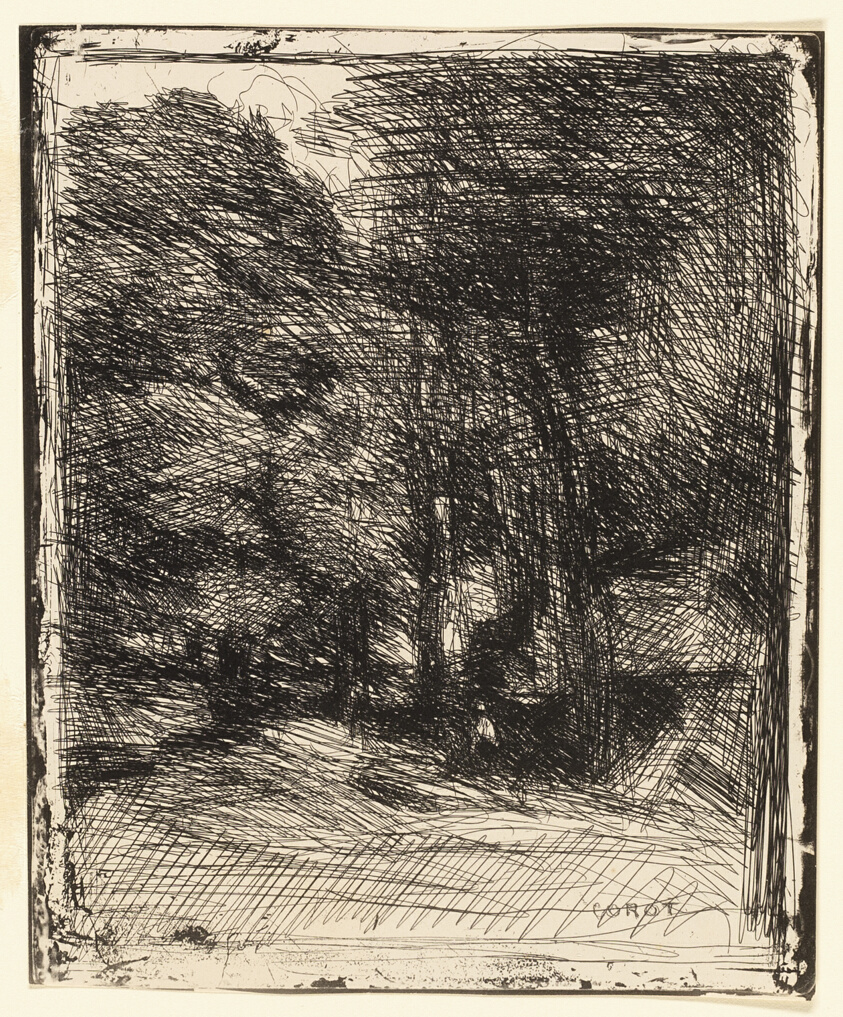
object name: Print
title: Souvenir of Bas-Bréau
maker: Jean-Baptiste-Camille Corot; French, 1796-1875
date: 1858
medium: Cliché-verre on ivory photographic paper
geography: France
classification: cliché-verre; print; prints and drawing